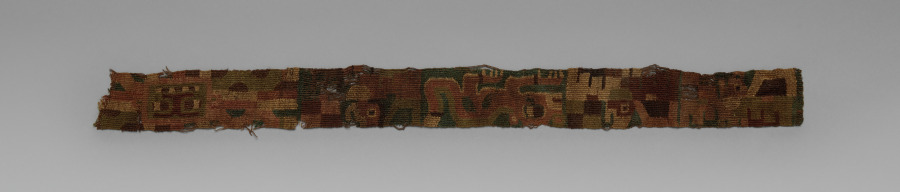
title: Fragment of a Belt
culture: Peru, South Andes, Tiwanaku style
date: c. 400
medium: camelid wool; tapestry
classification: Textile